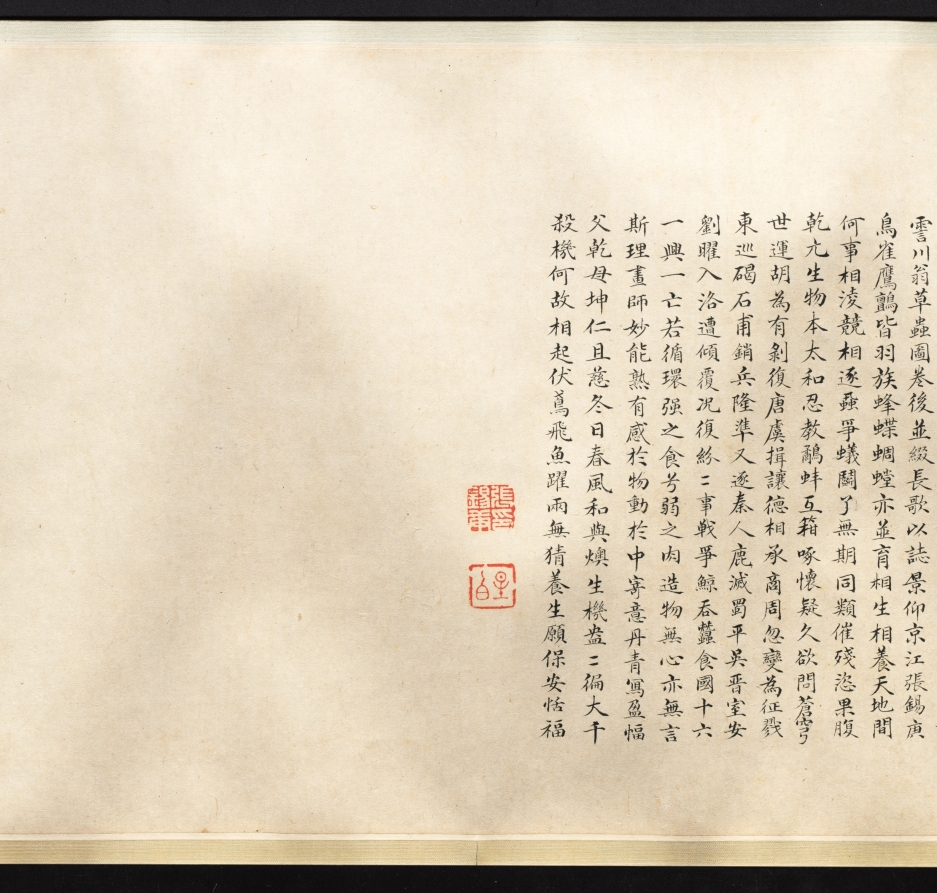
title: Insects and Flowers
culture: China, Qing dynasty (1644-1911) or Republican period (1912-49)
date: c. 1900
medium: Handscroll, ink and color on paper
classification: Painting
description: More than 26 feet long, this scroll presents insects, reptiles, and plants in delicate brushwork and pale colors, referring in style to earlier Southern Song dynasty (1127–1279) bird-and-flower paintings. Upon closer inspection, ants dismember a butterfly and reptiles wait to ambush their prey. An inscription at the end of the painting gives us an idea of its meaning: Attributed to the Qing dynasty scholar Zhang Xigeng (張錫庚, 1801–1861), the inscriber relates the work to an earlier painting by Qian Xuan (錢選, c. 1235–before 1307) and further suggests that the painting may allude to the relentlessness of natural selection. By drawing a parallel to tumultuous episodes in Chinese history, the writer might even hint at the domestic rebellions and the aggression of Western powers against China in his lifetime, particularly the Opium Wars (1839–60).